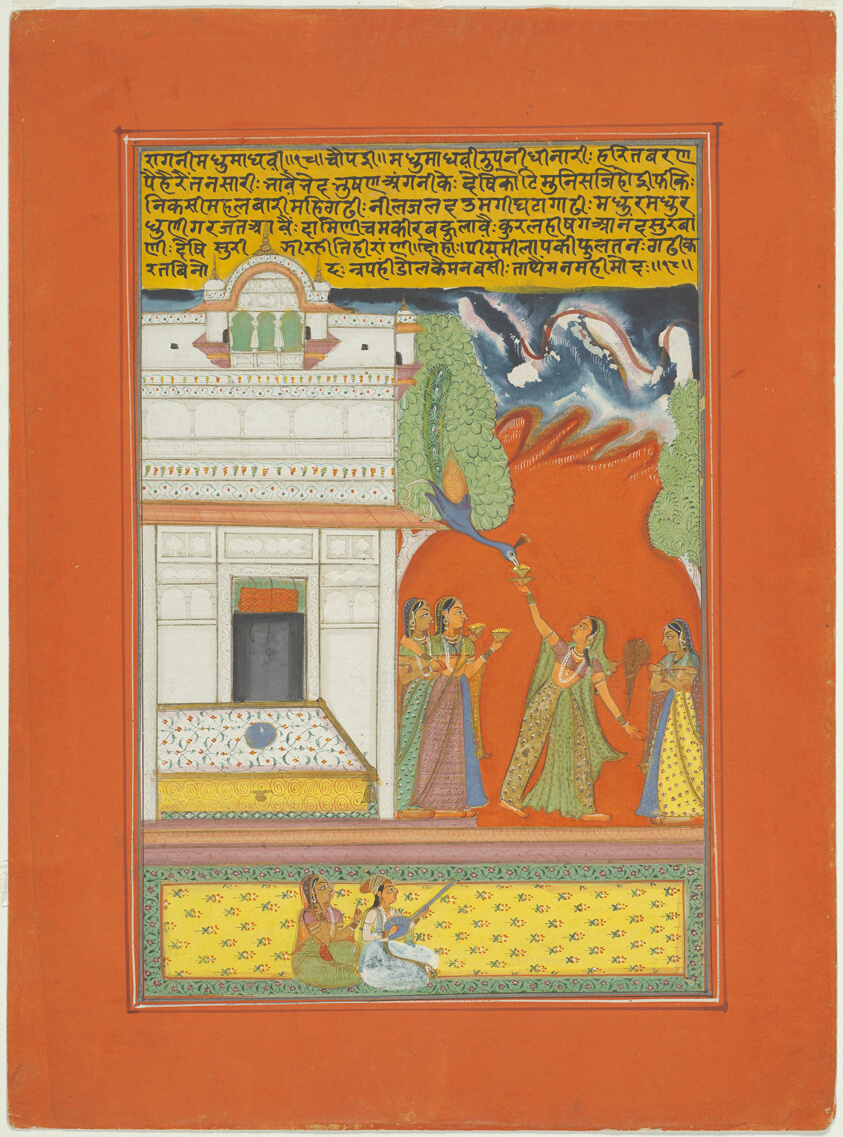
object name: Painting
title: Ragini Madhumadhavi, Page from a Jaipur Ragamala Set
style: South Asian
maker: India; Rajasthan, Jaipur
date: c. 1750-1770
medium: Opaque watercolor and gold on paper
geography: Rajasthan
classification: miniature painting; painting; asian art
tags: music, musicians